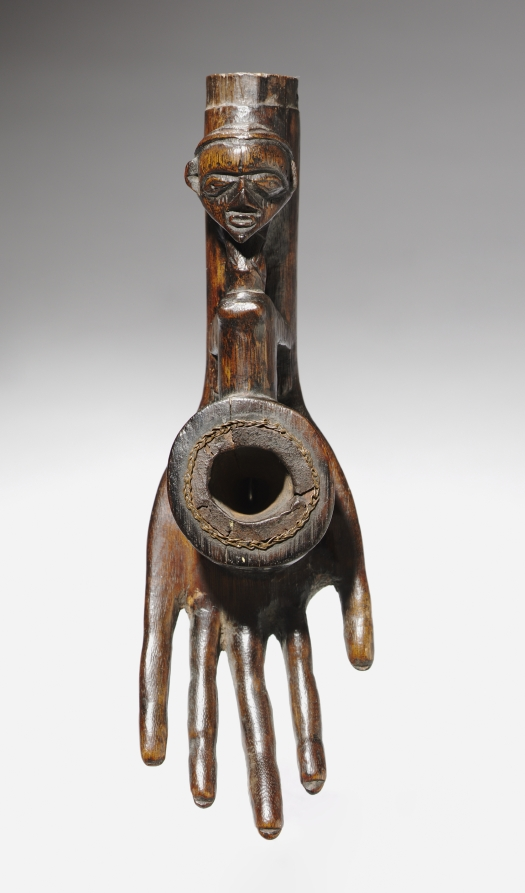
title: Pipe bowl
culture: Africa, Central Africa, Democratic Republic of Congo, Luluwa or Luntu maker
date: early to mid-1900s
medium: Wood, iron, and copper alloy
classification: Implements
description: Tobacco smoking had important social connotations in Central Africa, denoting age, status, and gender. Perhaps the enlarged hand expressed physical and spiritual powers and indicates that this work belonged to a chief. Figuratively carved pipes and snuff mortars constitute important genres of Luluwa decorative arts. As personal objects reflecting the prominence and success of their male and sometimes female owners, they are usually the creative work of virtuoso artists and take a variety of often imaginative shapes.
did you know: The cavity for the tobacco is positioned in the belly of a figure who holds himself up with bent arms on the pipe.